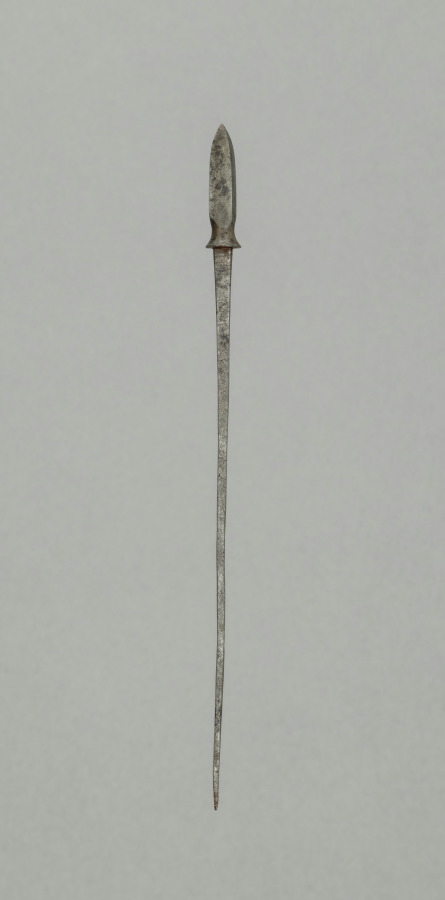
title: Arrow Point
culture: Japan, Edo period (1615–1868)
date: 1700s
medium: steel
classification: Arms and Armor